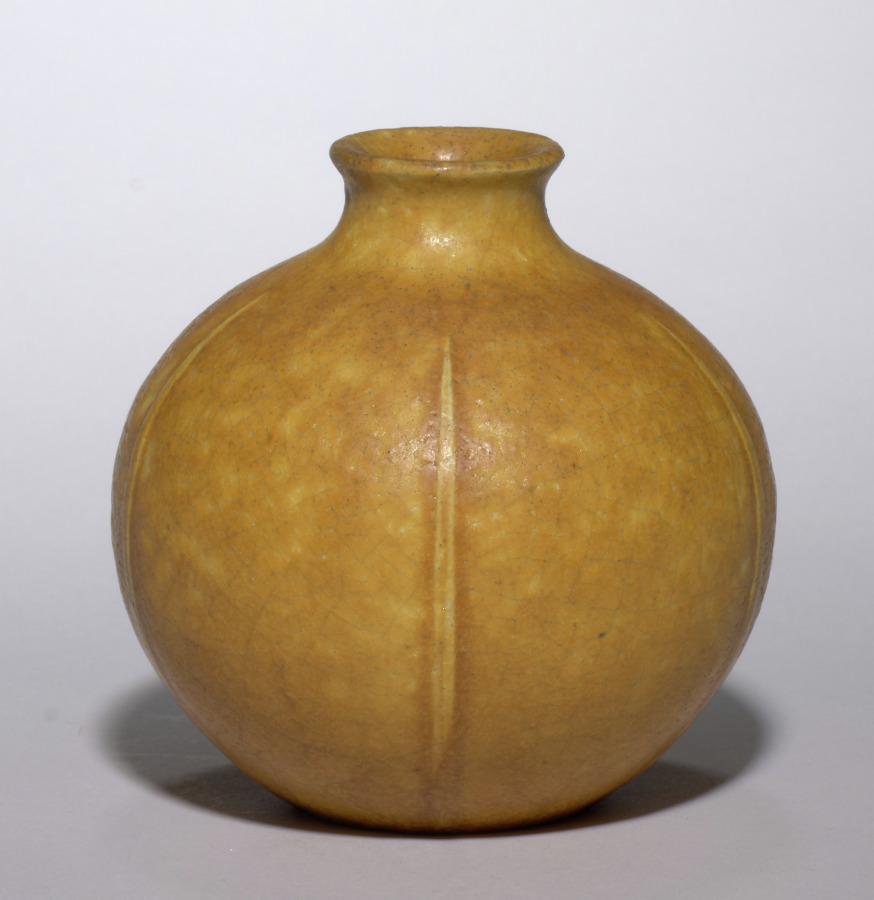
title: Vase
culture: America, Massachusetts, Boston, early 20th Century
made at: Grueby Pottery Company (American)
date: c. 1900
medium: ceramic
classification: Ceramic